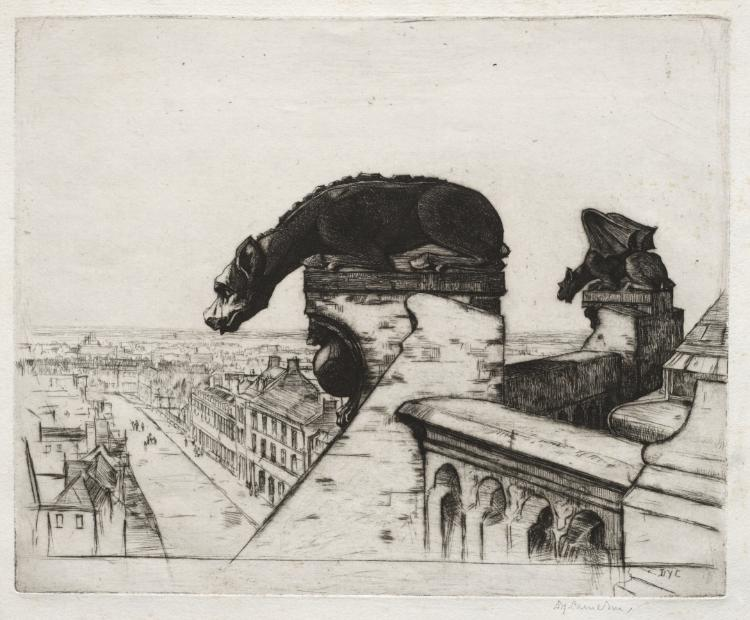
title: The Wingless Chimera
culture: England, 20th century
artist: David Young Cameron (British, 1865–1945)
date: 1911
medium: etching and drypoint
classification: Print